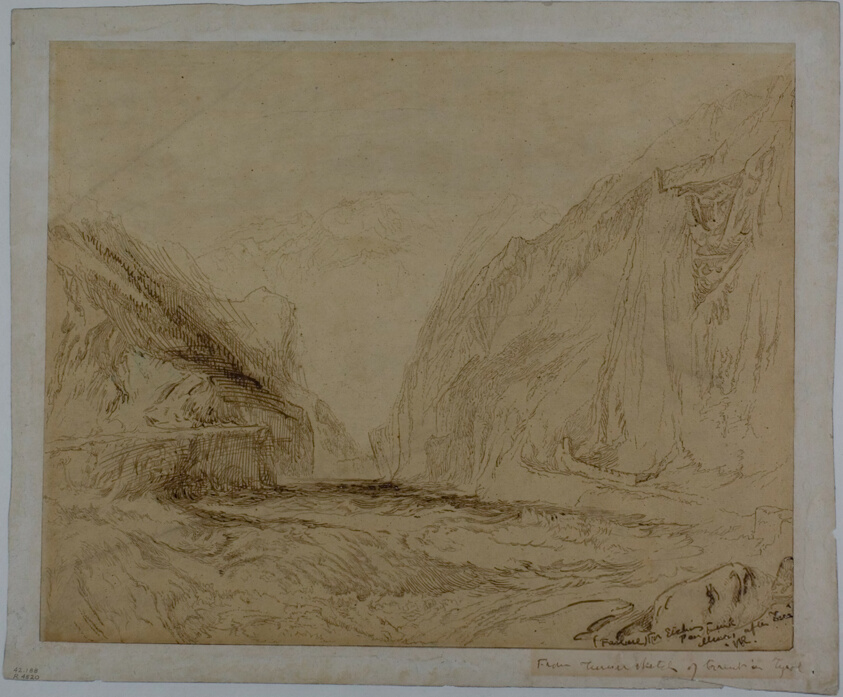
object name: Drawing and Watercolor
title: Torrent in Tyrol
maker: John Ruskin (English, 1819-1900)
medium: Pen and ink on paper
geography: England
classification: pen and ink drawings; drawings (visual works); prints and drawing